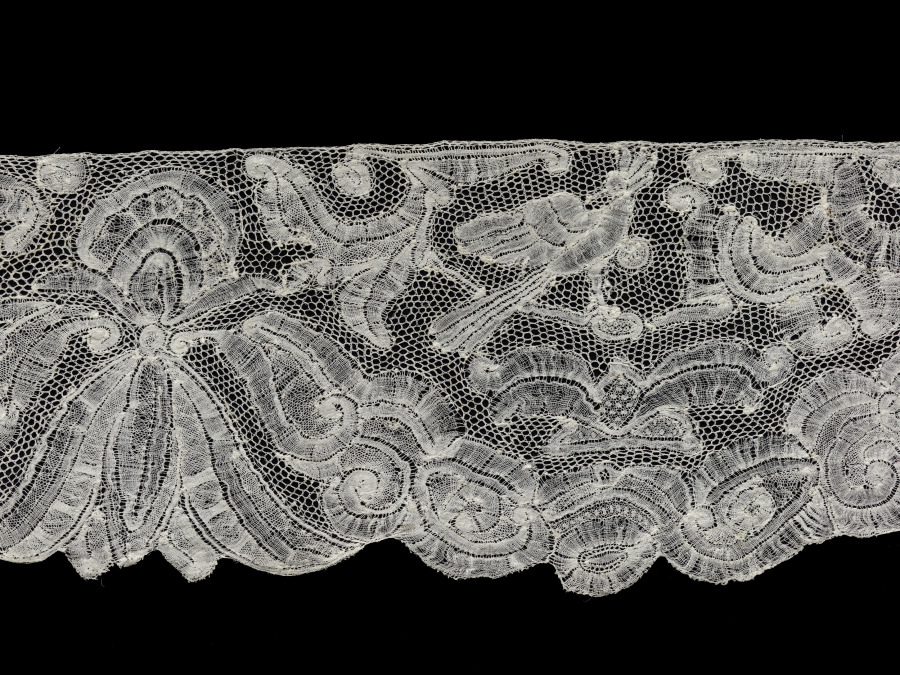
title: Lace Edging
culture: Flanders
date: 1800s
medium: Linen: bobbin lace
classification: Lace